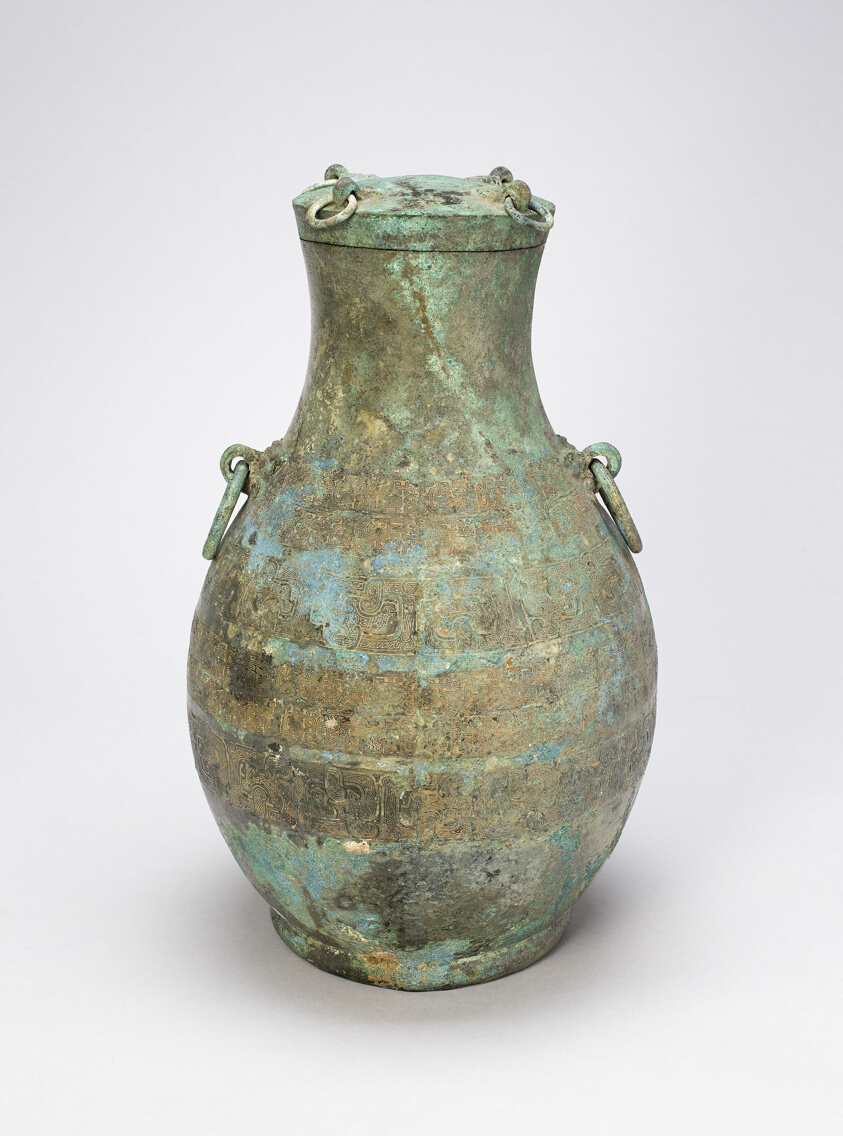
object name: Vessel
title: Wine Jar (Hu)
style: Chinese (culture or style)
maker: China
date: Eastern Zhou dynasty, late Spring and Autumn/early Warring States period (770–222 B.C.), early 5th century B.C.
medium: Bronze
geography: China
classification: bronze; metal; vessel; asian art